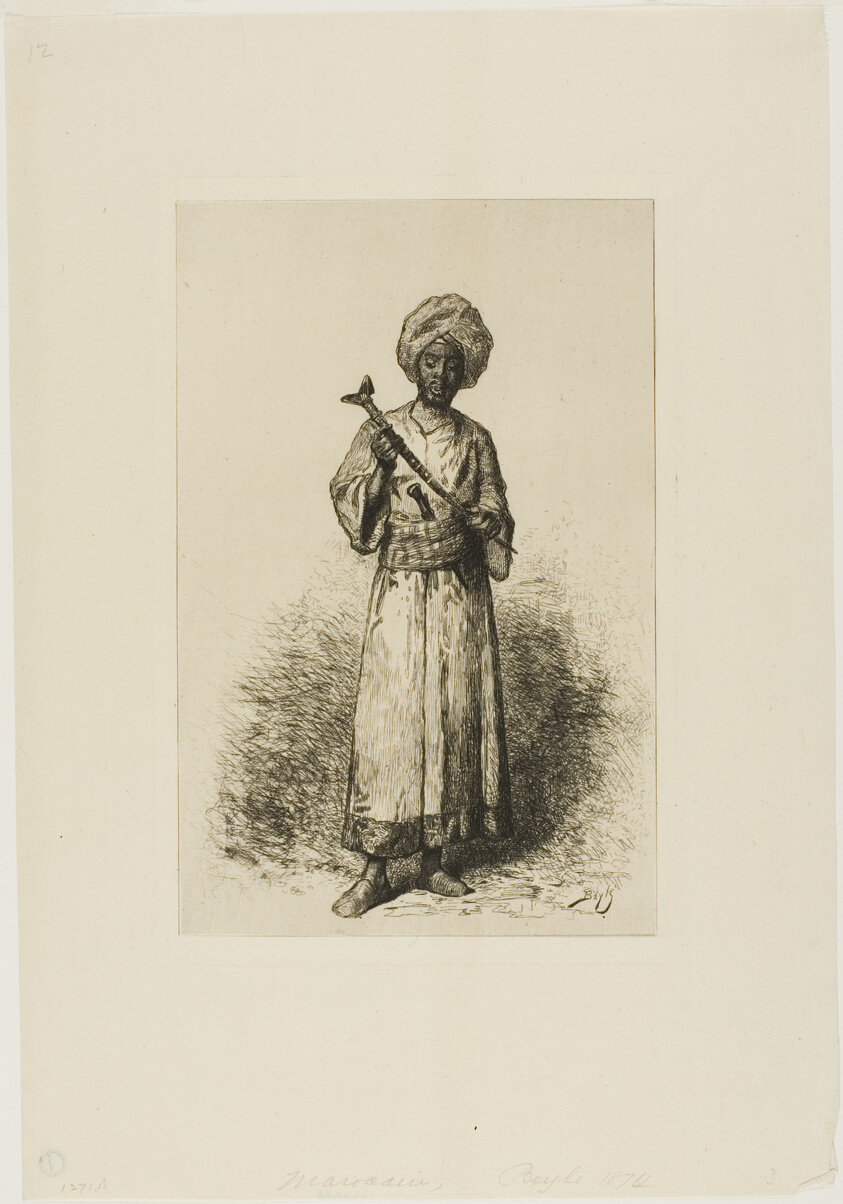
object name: Print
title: Morrocan Man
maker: Pierre Marie Beyle (French, 1838-1902)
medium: Etching on paper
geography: France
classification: etching; print; prints and drawing